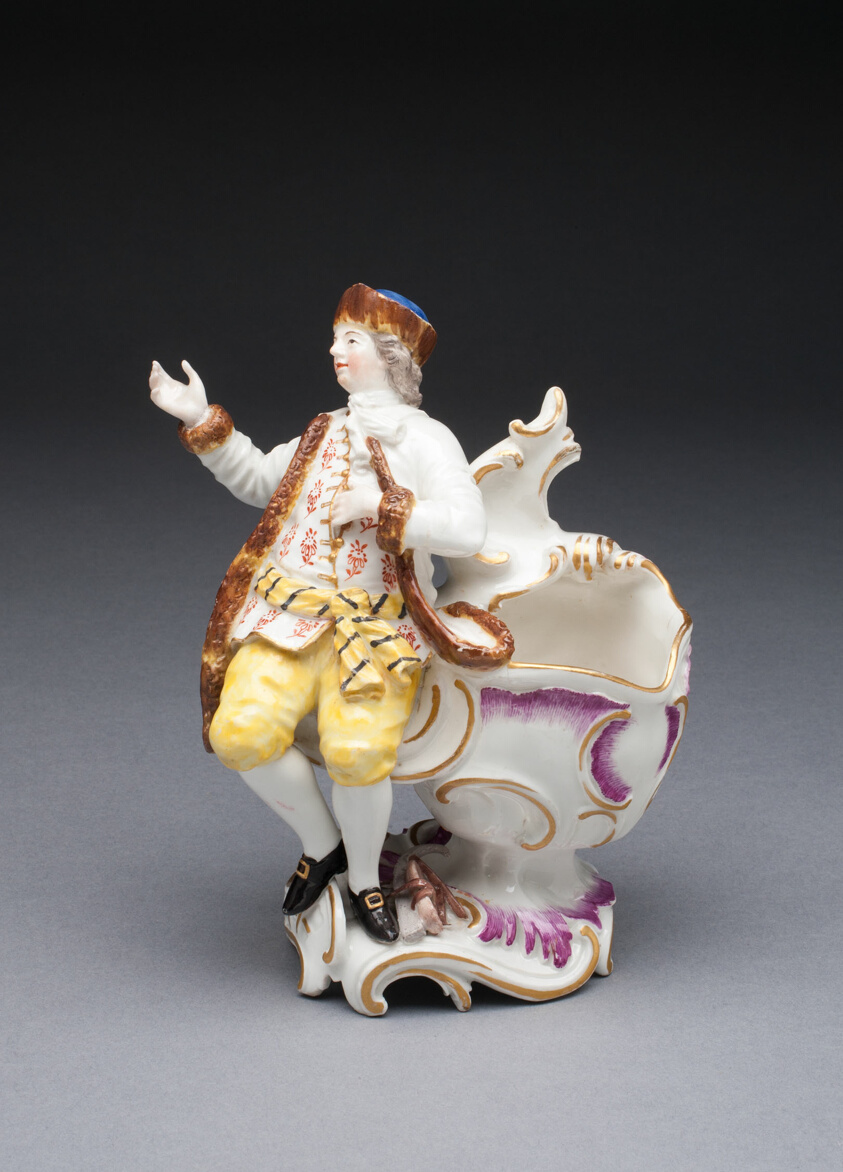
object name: Ceramics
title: Salt Cellar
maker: Johann Fredrich Lück (German, d. 1797)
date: 1762–1770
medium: Hard-paste porcelain, polychrome enamels, and gilding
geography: Frankenthal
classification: tableware; ceramics; porcelain; european decorative arts